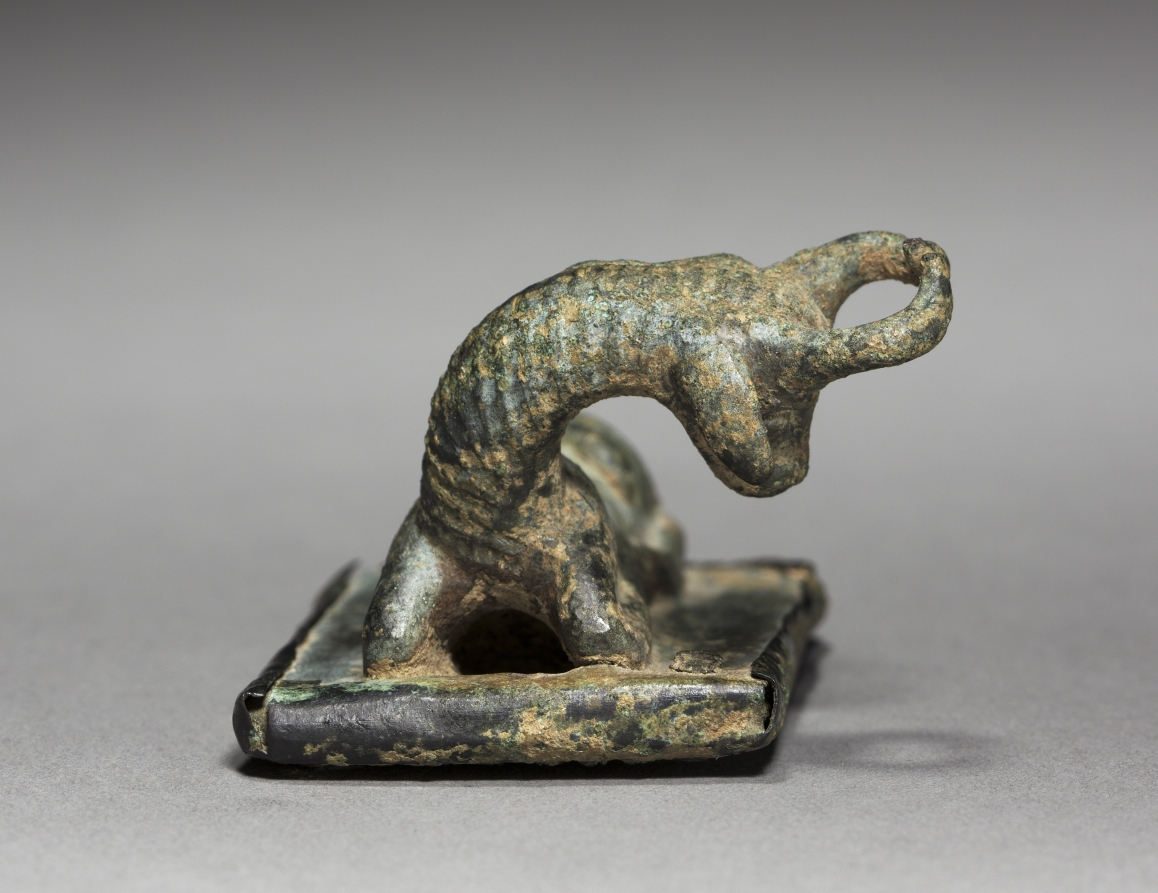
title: Recumbent Animal on Grater or Scraper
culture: Greece or Anatolia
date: 700–500 BCE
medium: bronze with iron grating plate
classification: Sculpture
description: An emaciated bull (or perhaps goat) lying on the ground, his legs tucked under in a resting position, may constitute a handle for this unusual object—likely a grater or scraper, judging from the perforated metal plate on its underside. The anatomically curious ridges across the neck and torso of the animal, as well as the large horned head turned perpendicular to the body, may have helped the owner grip the object while in use.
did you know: The exact use of this enigmatic object remains unknown.